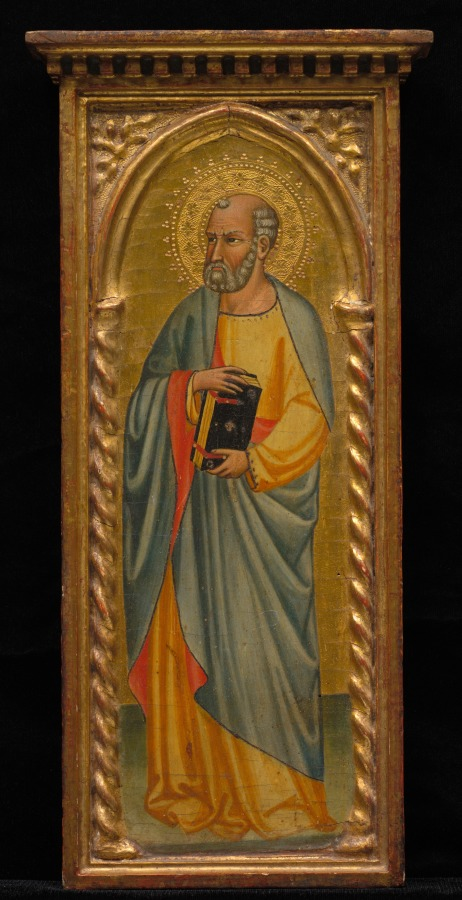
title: Standing Saint and Saint in Red Cloak (pair)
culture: Italy, late 19th-early 20th century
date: late 19th - early 20th century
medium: tempera on panel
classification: Painting